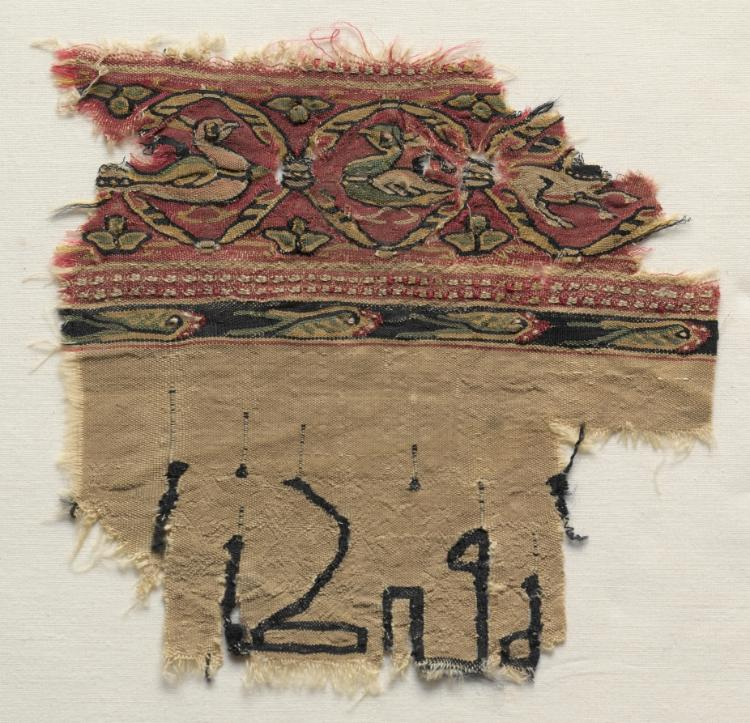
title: Tiraz with animated band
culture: Egypt, Abbasid period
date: 800–825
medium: plain weave with inwoven tapestry weave and supplementary weft: wool and linen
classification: Textile